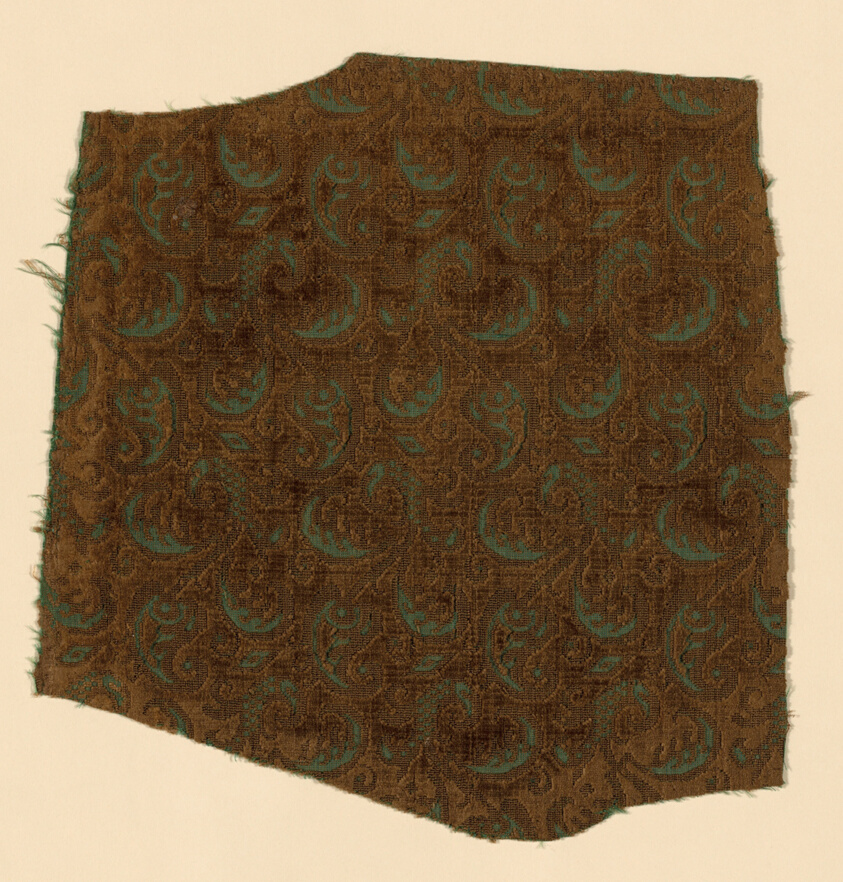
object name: Textile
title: Fragment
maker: Italy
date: 1601/25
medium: Silk, plain weave with supplementary pile warps forming cut, uncut, and voided velvet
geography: Italy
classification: textile; weaving - velvet; weaving